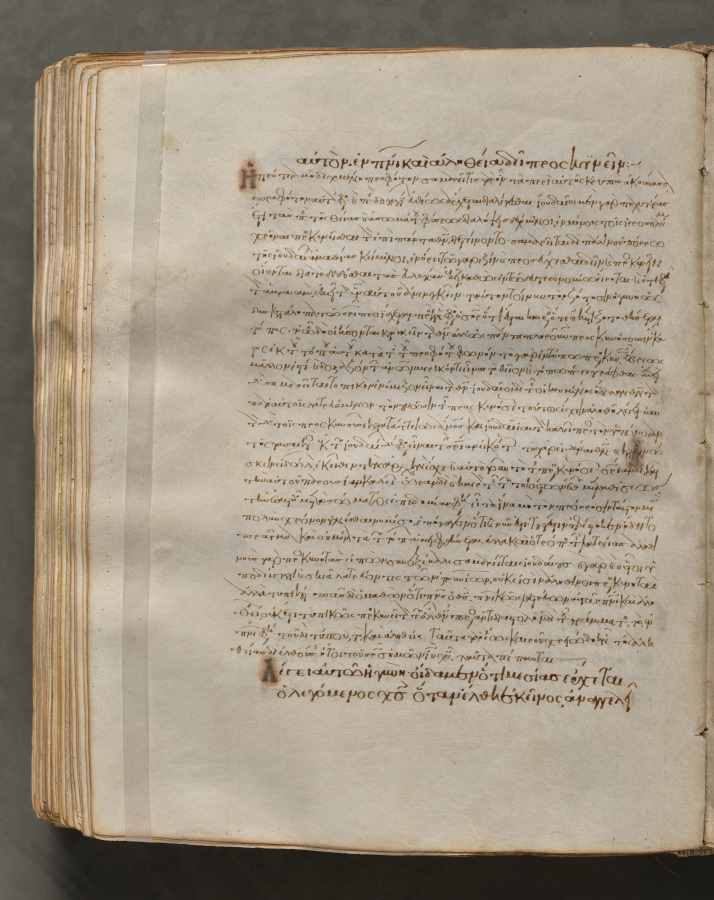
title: Text, folio 339 (verso), from a Gospel Book with Commentaries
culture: Byzantium, Constantinople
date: c. 1000–1100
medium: ink, tempera, and gold on vellum; leather binding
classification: Bound Volume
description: Each of the four gospels in this book opens on a page with brilliantly illuminated borders depicting the author of the text as well as birds—principally peacocks, symbols of the immortality of the soul—and fountains, representing the fountain of life and the salvation of the soul. This volume consists of 428 leaves with texts in Greek. Its level of sophistication suggests that it was probably written and decorated in a monastery in Constantinople.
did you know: Gospel books were carried in procession through Byzantine churches.